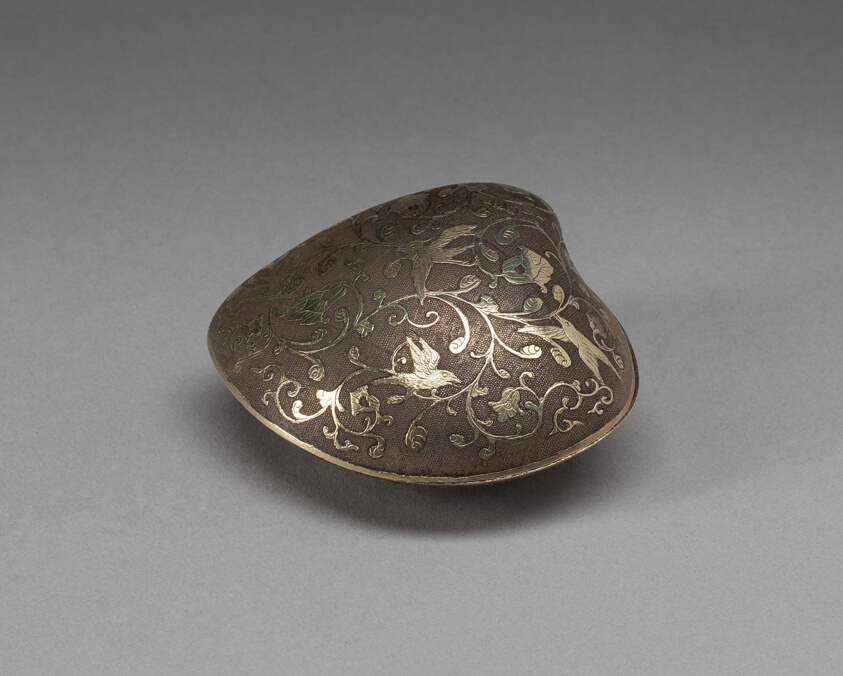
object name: Decorative Arts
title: Box in the Form of a Clamshell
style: Chinese (culture or style)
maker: China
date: Tang dynasty (618–907), first half of 8th century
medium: Silver with parcel gilding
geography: China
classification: silver; metalwork; asian art; decorative arts